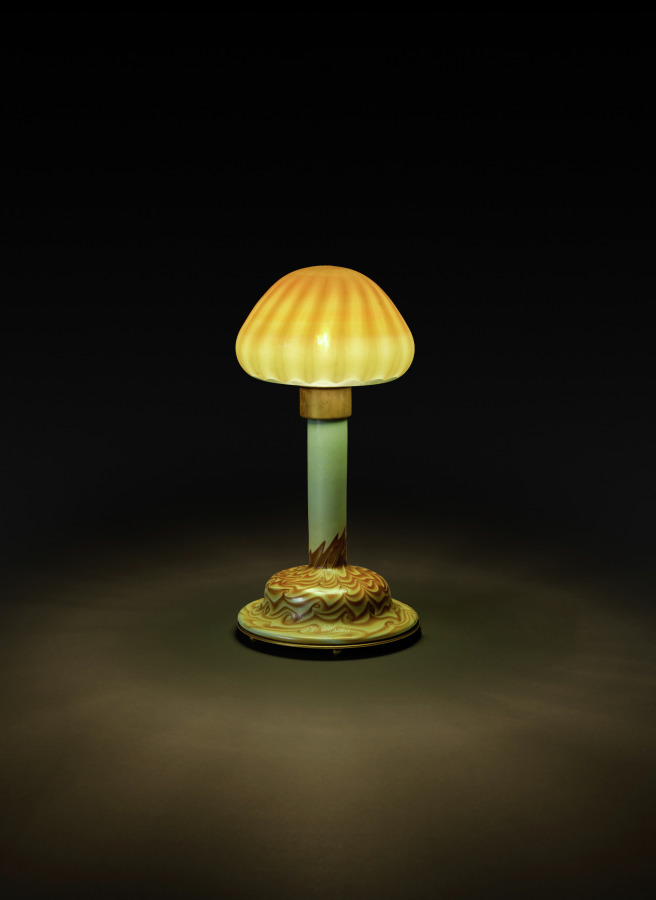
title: Mushroom Night Lamp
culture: America, New York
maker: Tiffany Glass & Decorating Company (America, New York, 1892–1902)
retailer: Tiffany Studios (United States, New York, 1902–32)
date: c. 1896–1902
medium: Favrile glass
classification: Lamp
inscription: TIFFANY STUDIOS/NEW YORK/14943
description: This small night lamp is made almost entirely of Louis Comfort Tiffany's signature Favrile glass. In the 1880s when Tiffany began collaborating with glass artists on new types of production, his aesthetic ambitions were realized in the development of Favrile glass, deliberately named to sound French, expensive, and “handmade.” Largely through Tiffany's marketing ability, Favrile glass became America’s greatest contribution to the Art Nouveau style. His works were exhibited at international expositions; galleries in major European cities, where his creations were bought by many museums; and in his store in Manhattan, known as the Tiffany Glass and Decorating Co., later Tiffany Studios. From the outset, Tiffany used Favrile glass in mosaic panels, stained glass windows, and his artistic line of table and floor lamps.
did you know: Mushrooms were a popular Art Nouveau motif used throughout Louis Comfort Tiffany's artistic production.